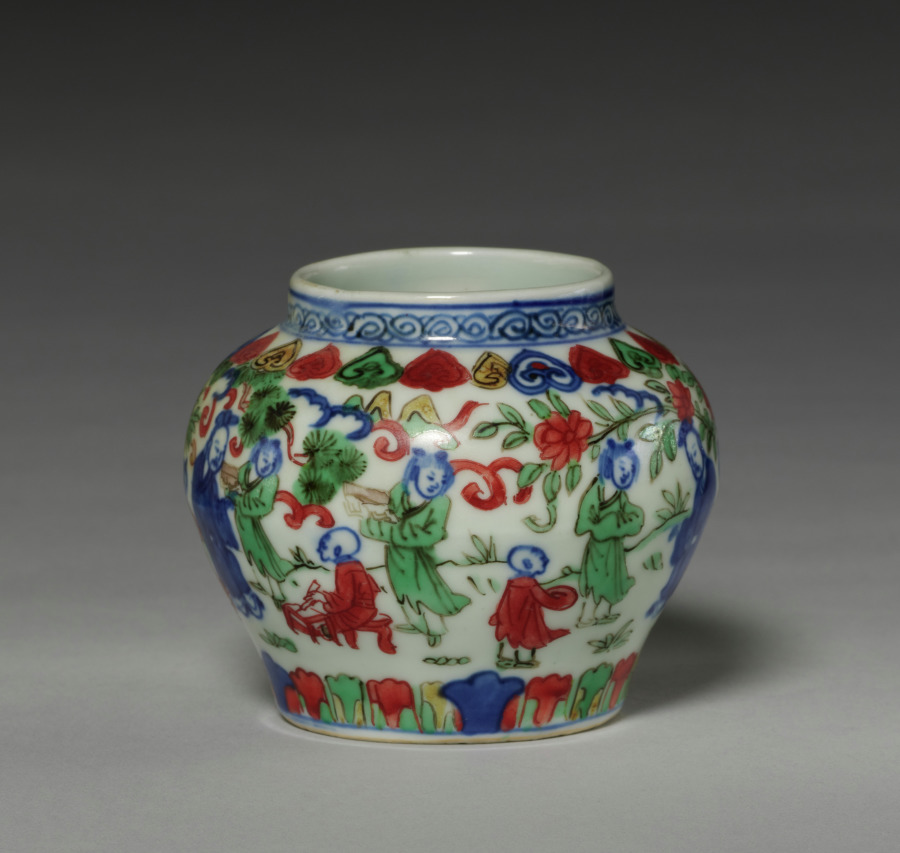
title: Covered Jar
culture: China, Jiangxi province, Jingdezhen kilns, Ming dynasty (1368-1644), Wanli reign (1573-1620)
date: 1573–1620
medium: porcelain with blue underglaze decoration and overglaze enamels in red, green, and yellow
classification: Ceramic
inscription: 大明萬曆年製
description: In the Ming (1368–1644) and Qing (1644–1911) dynasties, luxury items became more affordable to larger parts of the society, including women, merchants, and literati in non-official positions. Imperial patronage and a growing urban population encouraged consumption of luxury goods and local craftmanship. This covered porcelain jar has blue underglaze and overglaze in red, green, and blue enamels. It shows Ming dynasty advancements in porcelain decoration and the creative mind of the talented artisans who made it.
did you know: This jar is painted with 16 figures of all ages enjoying a garden setting.